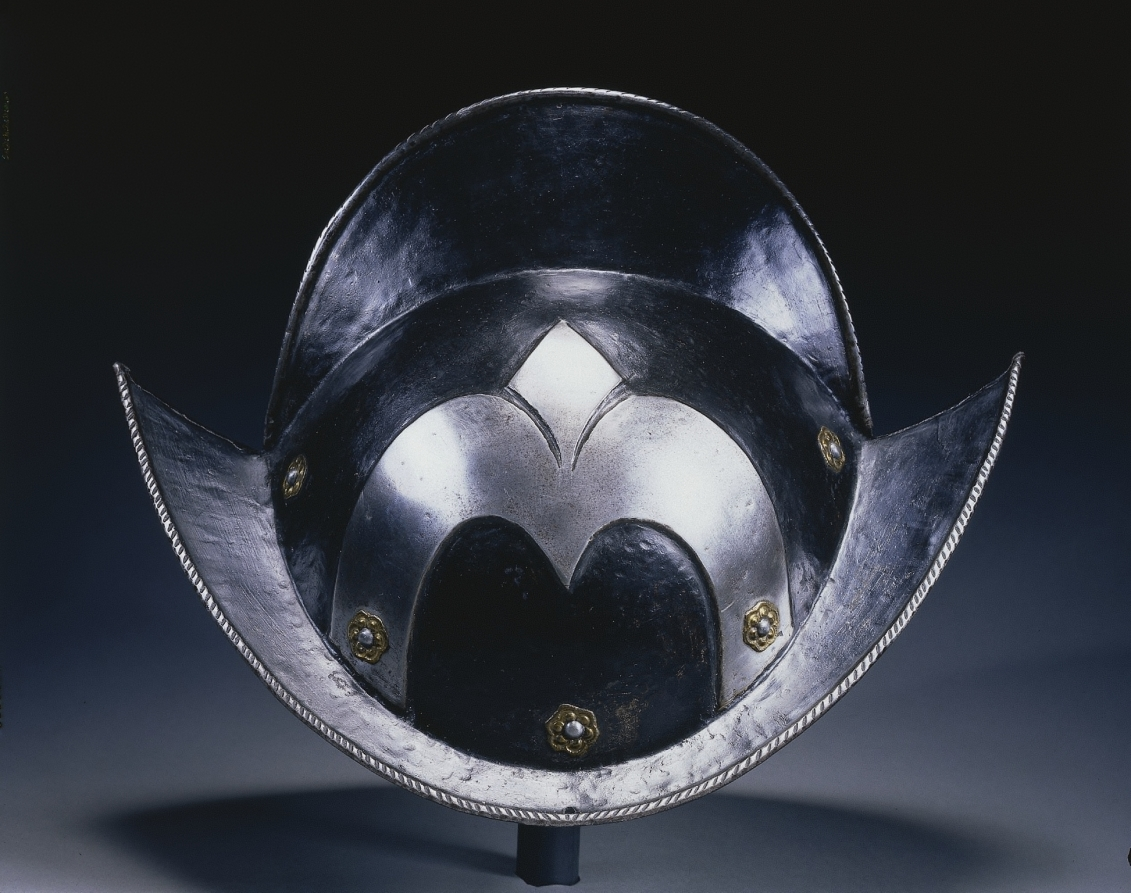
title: Black and White Morion (of Munich Town Guard)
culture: Germany, late 16th Century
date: c. 1575–1600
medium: steel, roped edge, decorative brass rivet washers as rosettes; black paint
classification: Arms and Armor